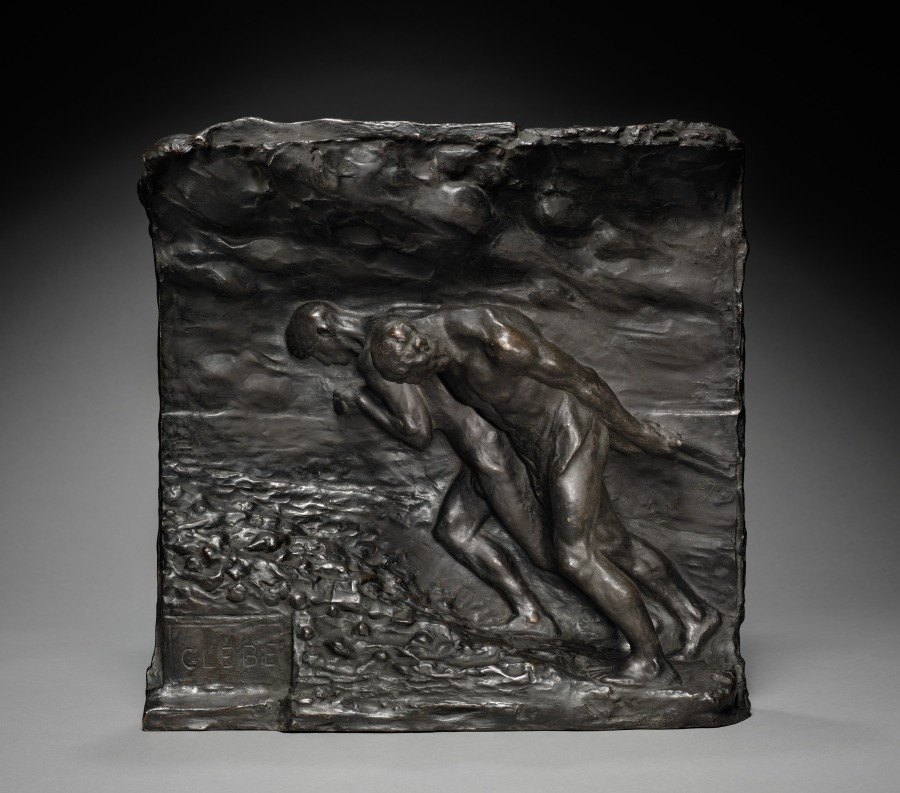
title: The Soil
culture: Belgium, 19th century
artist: Constantin Meunier (Belgian, 1831–1905)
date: c. 1890 – 1900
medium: bronze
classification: Sculpture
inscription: Signed right: "C. Meunier"; inscribed lower right front: "B. Verbeyot, Fondeur, Bruxelles."; lower left: "GLEBE"